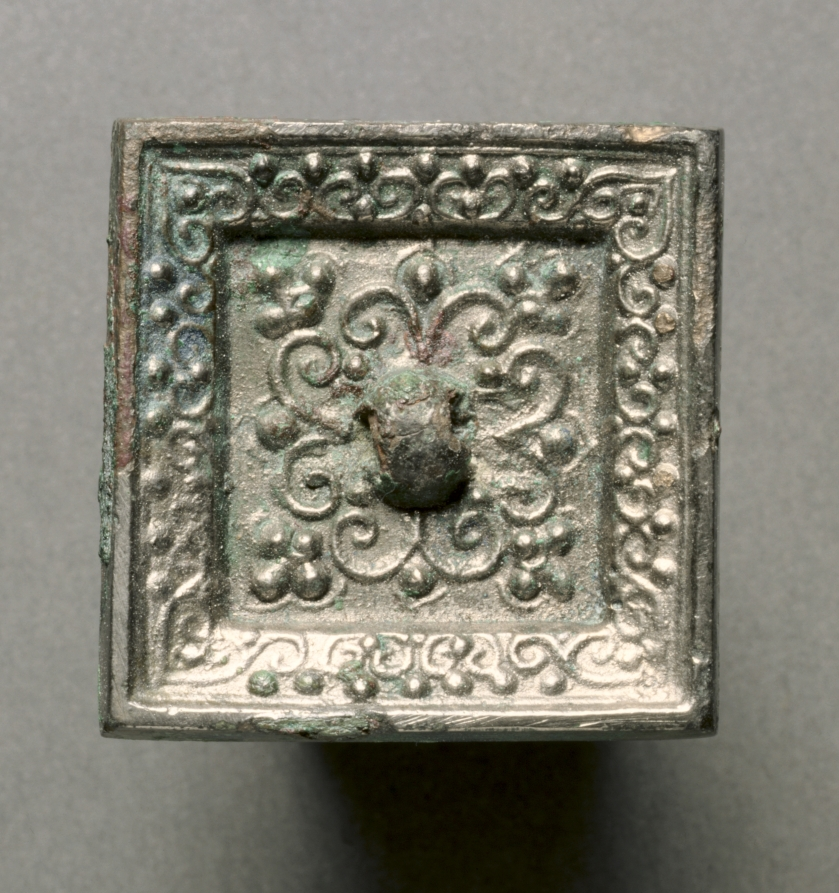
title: Miniature Square Mirror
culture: China, Sui dynasty (581-618)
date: 581–618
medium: bronze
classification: Metalwork